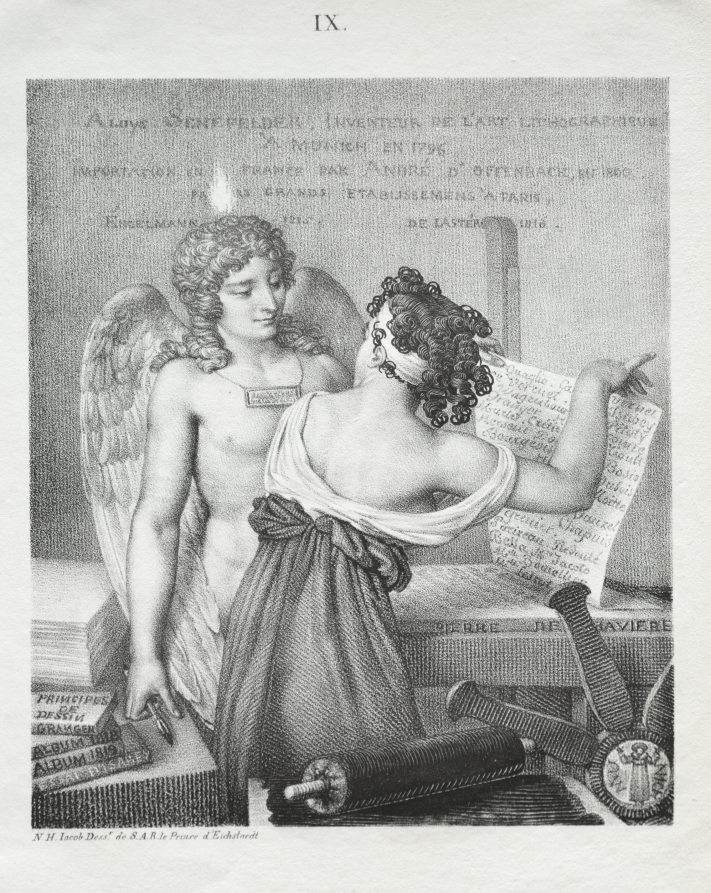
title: The Genius of Lithography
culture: France, 19th century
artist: Nicolas Henri Jacob (French, 1782–1871)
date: 1819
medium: crayon lithograph with brush and scratchwork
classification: Print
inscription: letters printed below image: NH Jacob Dess.r des S.A.R. le prince d'Eichstaedt printed in upper margin, IX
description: The Genius of Lithography celebrates the new printmaking technique (invented in 1798) that revolutionized illustration and enabled the reproduction of images at a reasonable cost, since numerous impressions can be printed from the lithographic stone. Artists liked the medium's flexibility: while rich blacks could be achieved for shadows, and every tone of gray was possible, a sharp point could scratch white highlights into dark areas.